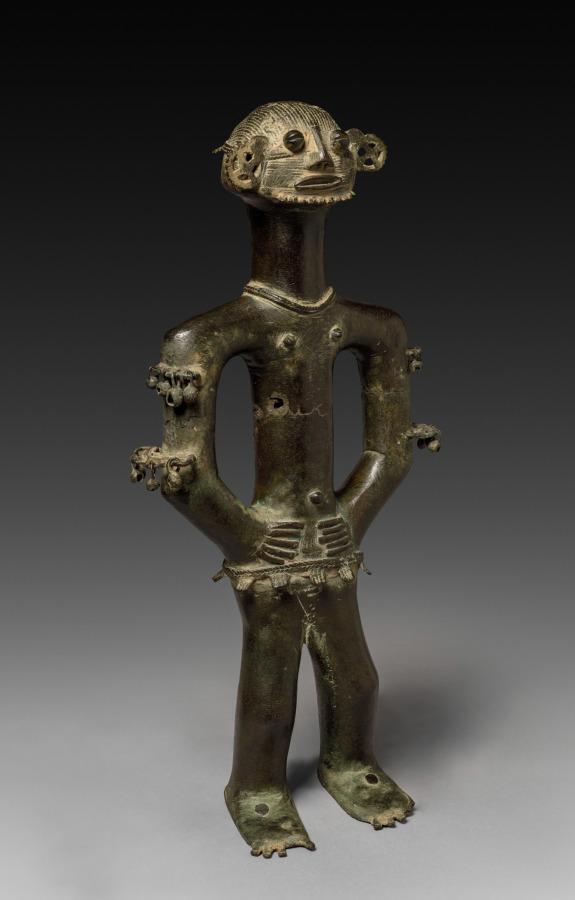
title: Male figure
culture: Africa, West Africa, Nigeria, Benue River Valley, Unidentified maker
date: probably 1800s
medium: Copper alloy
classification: Sculpture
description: Realized in a very distinctive style using the lost-wax method, this figure’s cultural origin and function is limited because it was removed from Nigeria during that country’s turbulent civil war of the late 1960s. Perhaps it was once part of an altar or shrine dedicated to a guardian or tutelary spirit. Connotations of prestige and wealth may explain why copper-alloy objects were diffused across vast territory and inherited over many generations.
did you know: Figurative copper-alloy objects like this sculpture point to intense trade and the circulation of people, goods, and technologies in the Benue River Valley, resulting in a highly cosmopolitan society.